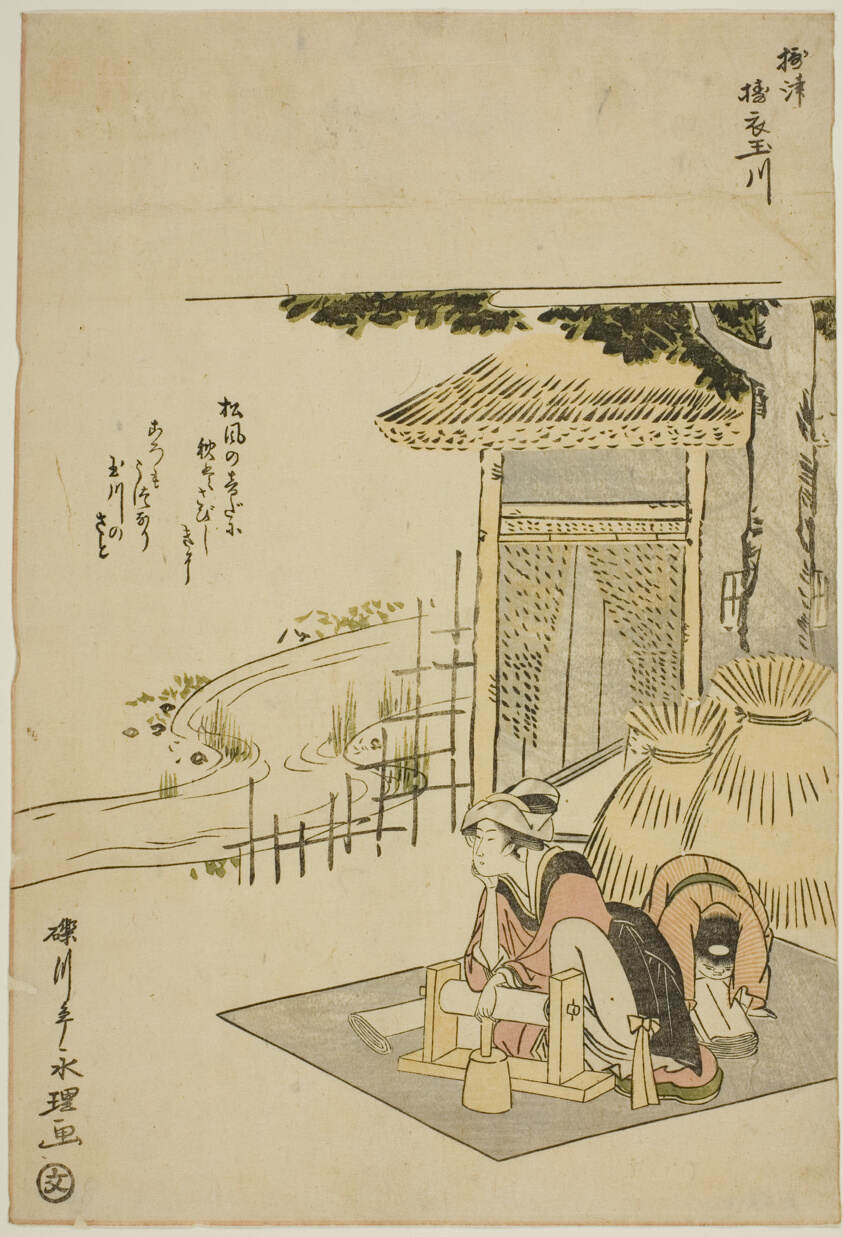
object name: Print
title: The Cloth-fulling Jewel River in Settsu Province (Settsu Toi no Tamagawa), from an untitled series of Six Jewel Rivers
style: Japanese (culture or style)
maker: Rekisentei Eiri (Japanese, active c. 1781–1818)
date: c. 1785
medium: Color woodblock print; aiban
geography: Japan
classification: woodblock print; print; asian art